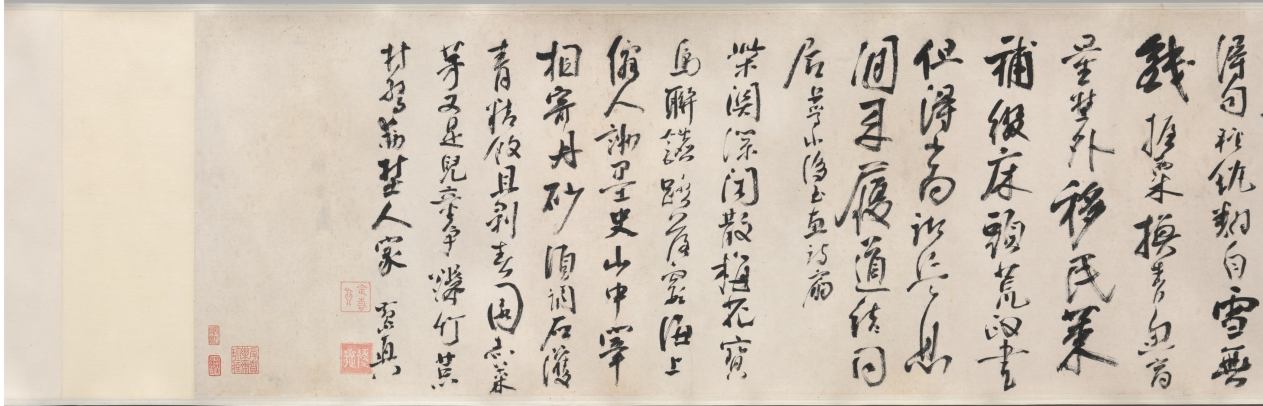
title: Snow Coloring the World White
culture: China, Qing dynasty (1644-1911)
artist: Fa Ruozhen (Chinese, 1613–1696)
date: 1690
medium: handscroll, ink on paper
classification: Painting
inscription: Artist's title on frontispiece, colophon with 6 poems, and 7 seals: [seal] Ch'ien-k'un i ts'ao t'ing. Snow Coloring the World White. Huang-shan lao-jen, Jo-chen, at the age of seventy eight. [2 seals] Fa yin Jo-chen; Huang-shih shih. (Artist's poems are not translated.) In the first month of the keng-wu year [1690], 1 was seventy-eight years old. On a snowy day I was pleased to have my good son-in-law Ch'eng-ssu and other gentlemen visiting me at my Tz'u-ching Hall at Yellow Hill. I did this snowscape to record the event. [2 seals] Fa Jo-chen; Tun Chai. [2 seals at end of painting] Fa yin Jo-chen; Huang-shih shih. trans. LYSL/WKH 12 additional seals: 8 of Ho Kuan-wu (20th c.); 1 of Wang Nan-p'ing (20th c.); 3 unidentified.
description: Fa Ruozhen was a scholar-official and prolific poet who focused on painting as his government career declined. The inscription records that he was 78 years old when he painted this handscroll to welcome visitors on a snowy day. At this point in his artistic development, Fa created expressive landscapes and experimented with unconventional brushwork. This handscroll begins at the right with gentle hills dotted with evergreens and bare deciduous trees. By the end, the twisting rocky forms dominate. Fa’s official career spanned the fall of the Han Chinese Ming dynasty (1368–1644) and the rise of the Manchurian Qing dynasty (1644–1911). While other scholar-officials who declined to serve the Manchus had their reputations enhanced, critics accused Fa of disloyalty for serving in the new bureaucracy. Fa was deeply sensitive about this criticism. In many of his 4,000 known poems, he responded by emphasizing the Confucian virtue of being a good administrator particularly during an unstable time. Fa’s “disorderly” brushwork and distressed landscapes seem to reflect the political upheaval of his era.